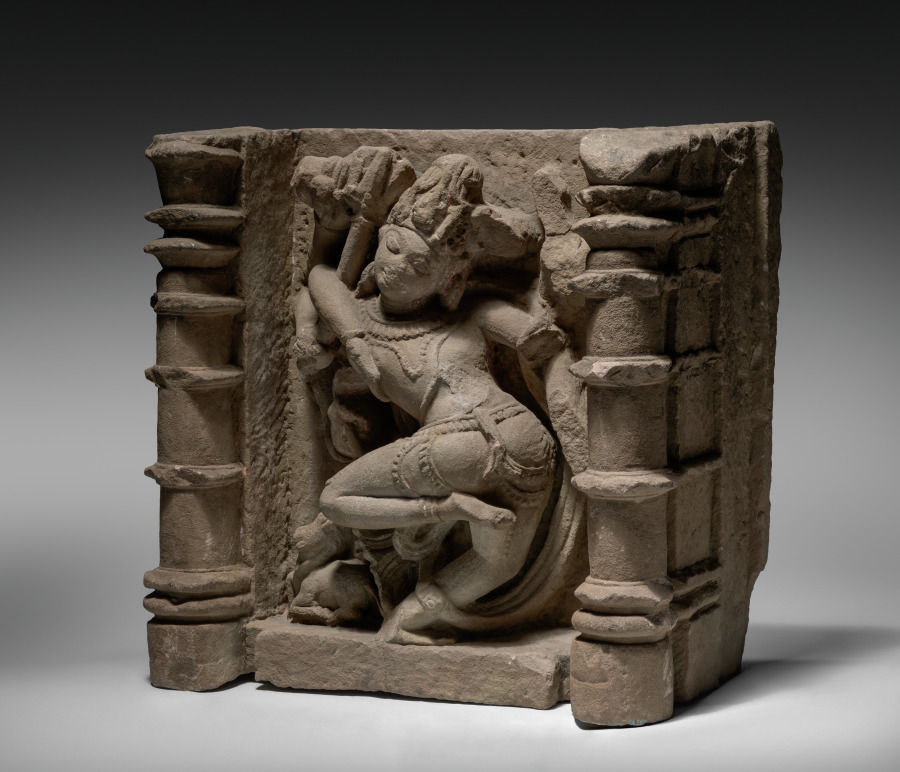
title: Eight Armed Shiva Dancing Between Two Pillars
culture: India, Rajasthan, Chandela Dynasty, 10th - 11th century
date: 900s–1000s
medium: sandstone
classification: Sculpture